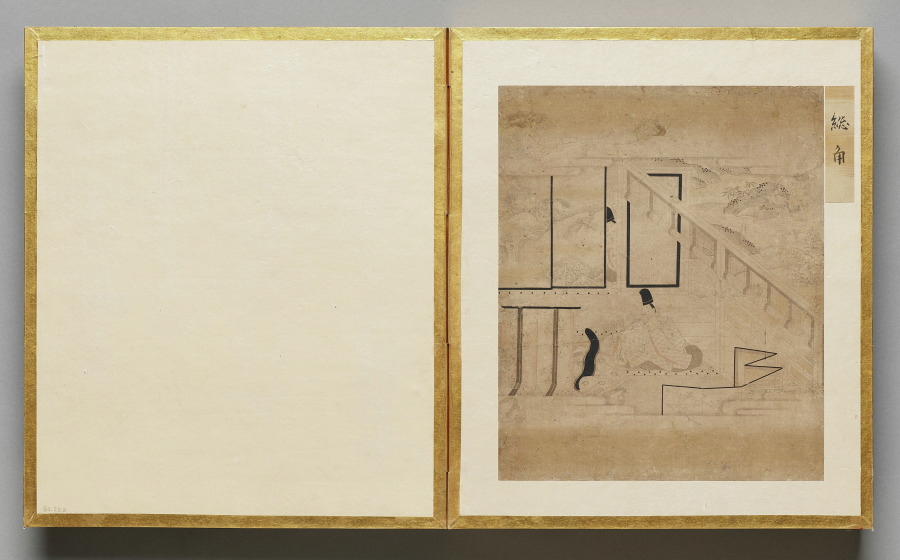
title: Trefoil Knots from Album of Illustrations for the Tale of Genji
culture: Japan, Edo period (1615–1868)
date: 1600s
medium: painting in an accordion-style album; ink, light color, and gold on paper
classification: Bound Volume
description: This album contains illustrations for the classic literary work the Tale of Genji, authored in the 1000s by Murasaki Shikibu, an aristocrat of the Heian period (794–1185) court. The scenes are painted in the “white drawing” (hakubyō) mode, in which a fine ink line is used to depict figures and spaces with great subtlety, punctuated only occasionally by traces of red pigment for a character’s lips, a detail of a garment, or a decorative element. These two scenes illustrate episodes from the chapters “Thin Veil of Cloud” (Usugumo) and “Barrier Gate” (Sekiya).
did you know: The illustrations are identified by chapter title in cartouches to the upper right of the paintings.